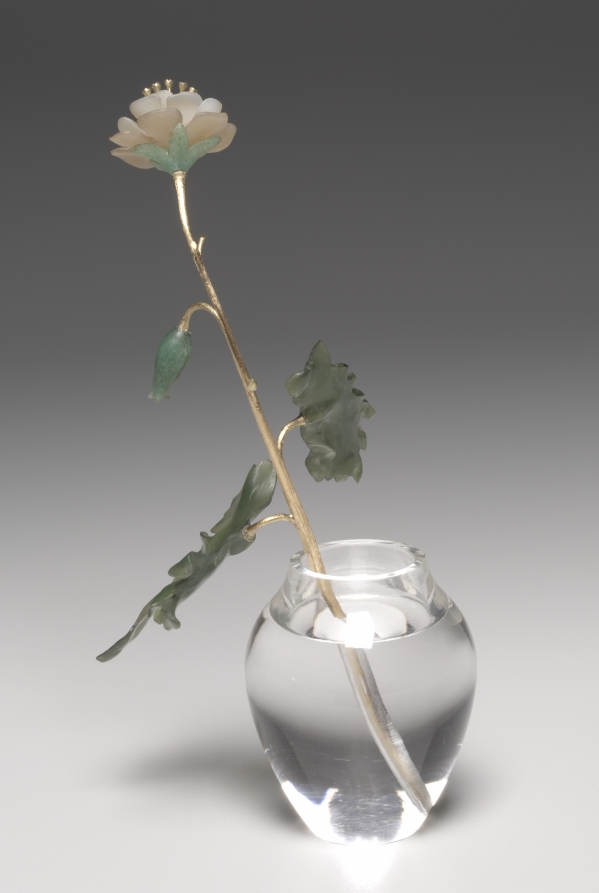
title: Flower Study of an Anemone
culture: Russia, St. Petersburg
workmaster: Henrik Wigström (Russian, 1862–1923)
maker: House of Fabergé (Russian, 1842–1918)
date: c. 1905–15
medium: mat white stone, gold, sapphires, jade, rock crystal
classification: Miscellaneous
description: This flower study depicts a wild anemone in bloom. Fabergé’s inspiration for his flower studies is said to have come from the floral brooches of precious stones that were made in the 1700s for Catherine the Great as well as from the Japanese art of flower arranging, known as ikebana. Small and delicate, Fabergé’s flower studies were given as intimate gifts to friends by the tsarina and others in the court. She also liked to take them around to wherever the imperial family was residing as a reminder of spring during the harsh Russian winters.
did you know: The stems of Fabergé’s flower studies are set into little basins carved from rock crystal to resemble pots of water.